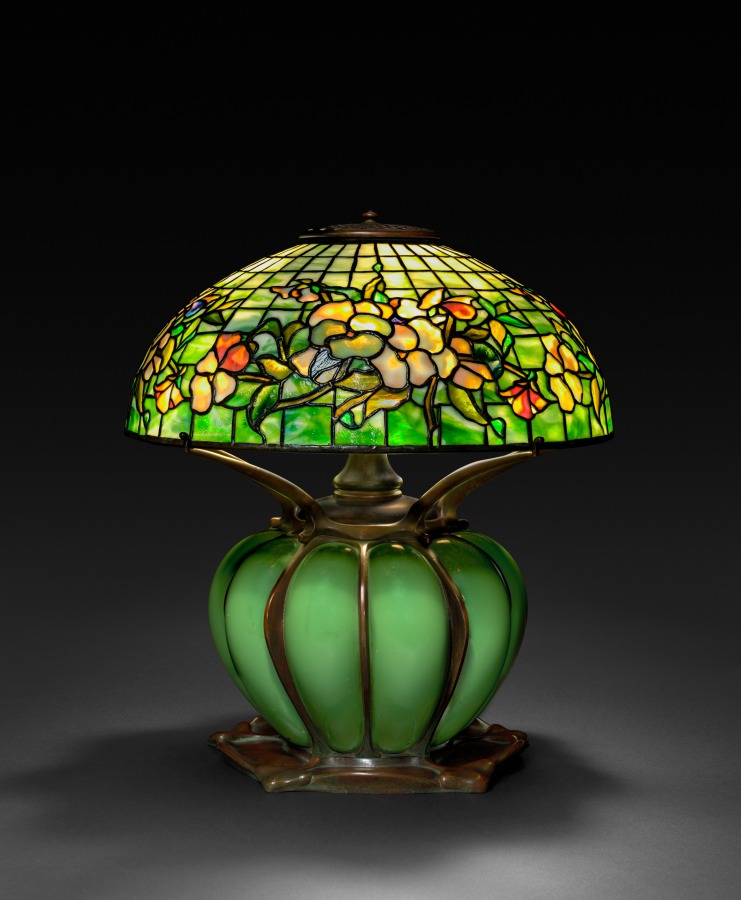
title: Pansy Border Table Lamp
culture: America, New York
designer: probably by Clara Wolcott Driscoll (American, 1861–1944)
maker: Tiffany Studios (United States, New York, 1902–32)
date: c. 1902–10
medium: Leaded glass, blown glass, bronze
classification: Lamp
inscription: mark underside oil reservoir: Tiffany Studios/New York/TGDCo/219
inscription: inside bottom rim of shade: Tiffany Studios New York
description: In the 1870s a renewed emphasis on natural landscapes ushered in a generation of cottage gardeners who delighted in planting perennials in large quantities. Louis Comfort Tiffany was among those who championed the lush, sometimes wild-looking displays of varied floral species in the garden at his Long Island estate, Laurelton Hall. He encouraged his designers to take inspiration from his garden by shipping fresh cuttings almost weekly to his studios. Ohio native Clara Wolcott Driscoll created patterns based on the colorful blooms of spring that became among the most sought after and commercially successful of Tiffany’s production.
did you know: This lamp features a rare base in which green glass is blown into a bronze cage—a very difficult technique since glass and bronze cool at different temperatures risking a complete shatter if not executed correctly.